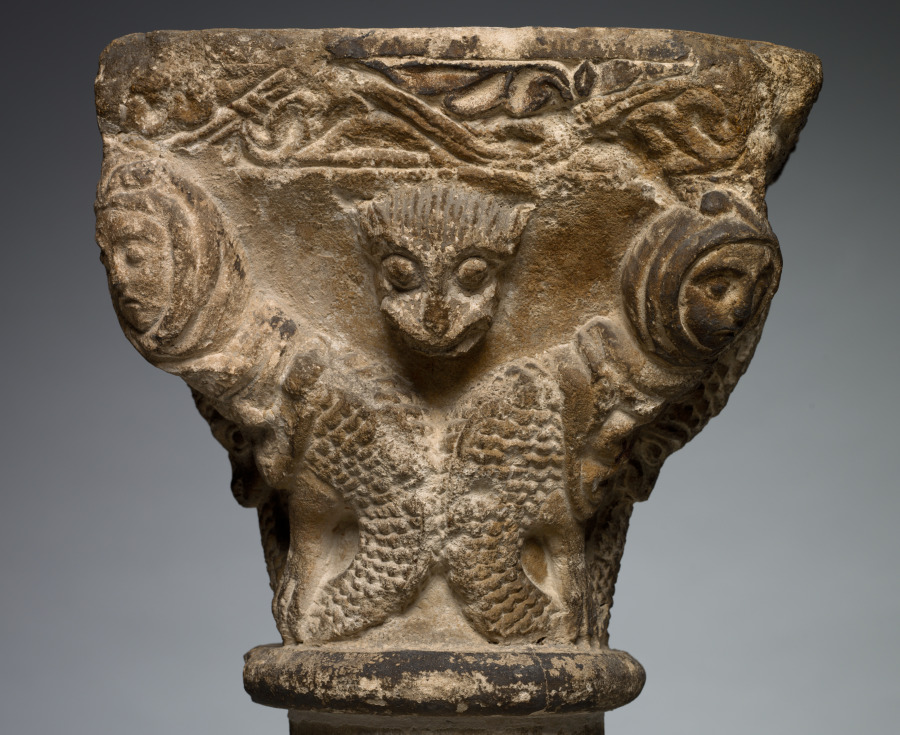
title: Capital with Addorsed Harpies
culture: Southwest France, Languedoc, Toulouse (?), 13th century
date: 1200s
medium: limestone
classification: Sculpture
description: Monstrous images were prevalent in the decoration of religious buildings during the Middle Ages. Such images must have impressed, perhaps even terrified, the monks and visitors who spent much of their time within the cloister or church, a place of prayer, contemplation, and reflection. Scholars have speculated how such images would have been received by the people given the ubiquity of monsters in medieval society. The carved monsters, often symbolizing vice and retribution for sin, were possibly designed to provoke a range of emotional responses including laughter, wonder, surprise, fear, and shock. This striking imagery must have had a strong impact, which in turn led Saint Bernard of Clairvaux (1090–1153), the spiritual head of the Cistercian order, to admonish their use as distracting from prayer.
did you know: A harpy is part bird and part woman featured often in Greek mythology.